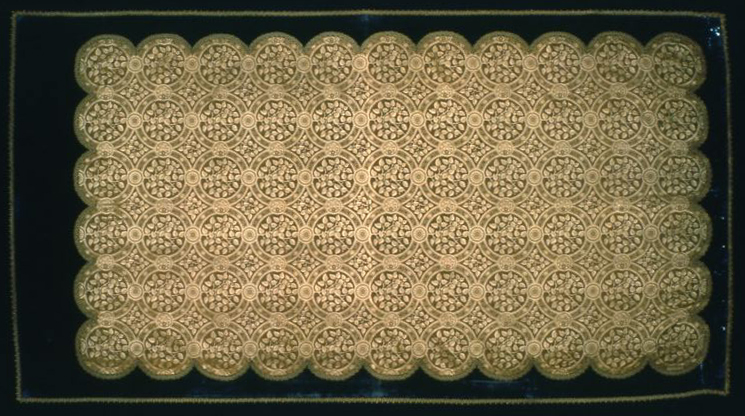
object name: Textile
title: Large Syringa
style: Aesthetic Movement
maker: Designed by Edward William Godwin (English, 1833–1886); Produced by Warner & Sons Ltd.; England, London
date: c. 1874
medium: Silk, satin weave, self-patterned by reversing of faces; edged with cotton and silk, plain weave with supplementary pile warps forming cut solid velvet; and silk and cotton, braid of plain weave with extended weft loops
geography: London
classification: textile; weaving; weaving - velvet